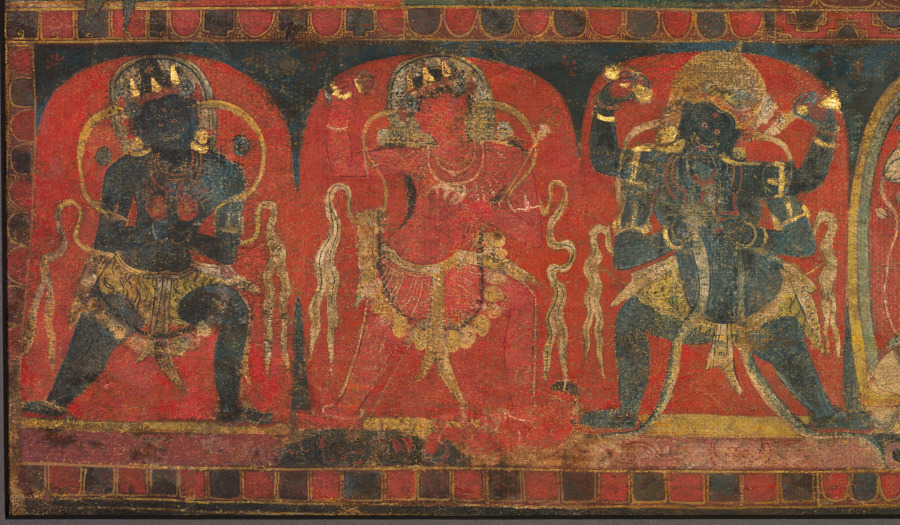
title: Tantric Buddha Vairochana as Vajrasattva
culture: Central Tibet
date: c. 1150–1200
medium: gum tempera, ink, and gold on cloth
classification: Painting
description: The seated Buddha dominating the composition is identified as Vairochana because of his hand gesture, the mudra communicating supreme enlightenment in which the index finger of one hand is grasped by the fingers of the opposite hand. His golden color and the tiny vajra—a six-pronged ritual object representing a thunderbolt—balanced on top of his finger suggest that he is in the guise of Vajrasattva, the summation of all enlightened beings. In his crown is the image of a monk, who is probably the guru of the donor, the small monastic figure at the lower right next to the lotus pedestal.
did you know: A mantra written behind the figures invokes their living presence in the thangka painting.